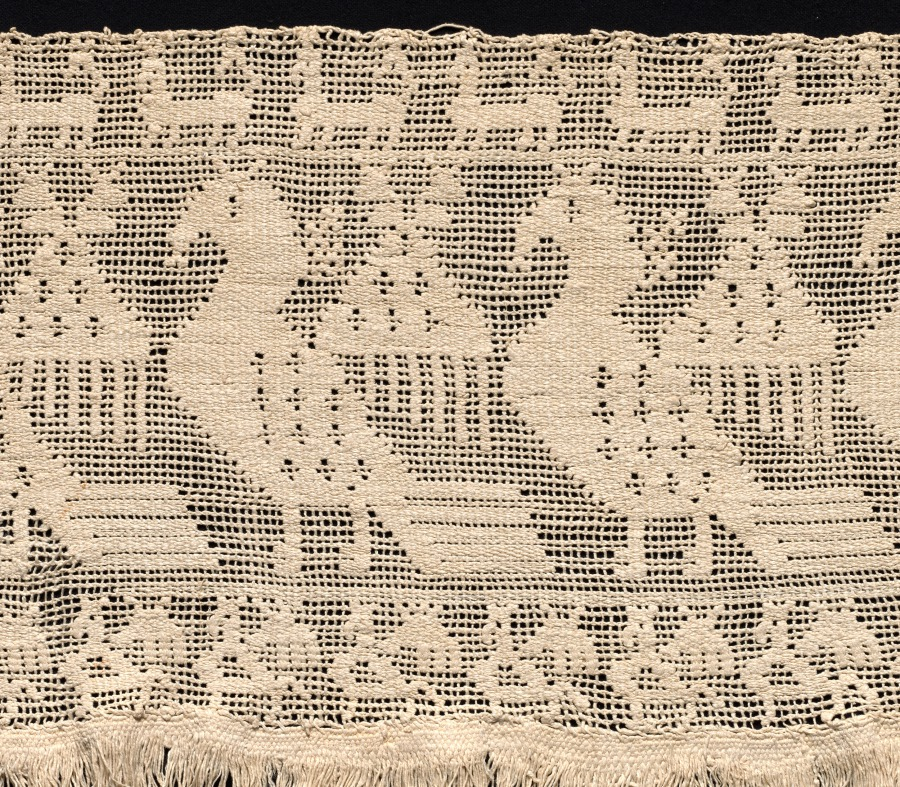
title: Fragment of a Border with Repeated Pattern of Fantastic Winged Animals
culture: Italy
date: 1500s–1600s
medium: Bleached linen: needle lace, burato (twined ground and darned in two directions) and fringe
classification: Lace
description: A four-legged animal pattern repeats in the top register, and winged birds appear in the central and bottom register. The birds, which are significantly larger in the central panel, may be peacocks.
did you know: The word lace derives from the Latin laqueus, meaning noose.